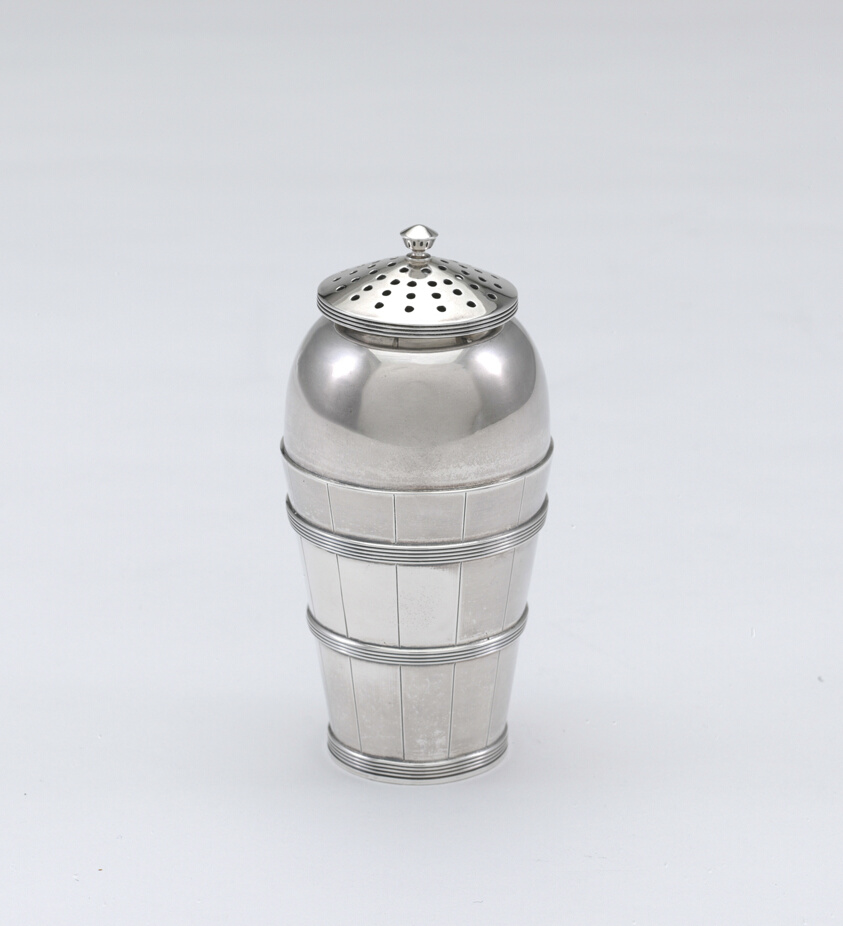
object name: Metalwork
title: Castor and Salt Dish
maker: Gorham Manufacturing Company (American, founded 1831); Providence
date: 1870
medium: Silver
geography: Providence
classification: condiment vessel; silver; american decorative arts; american arts; decorative arts